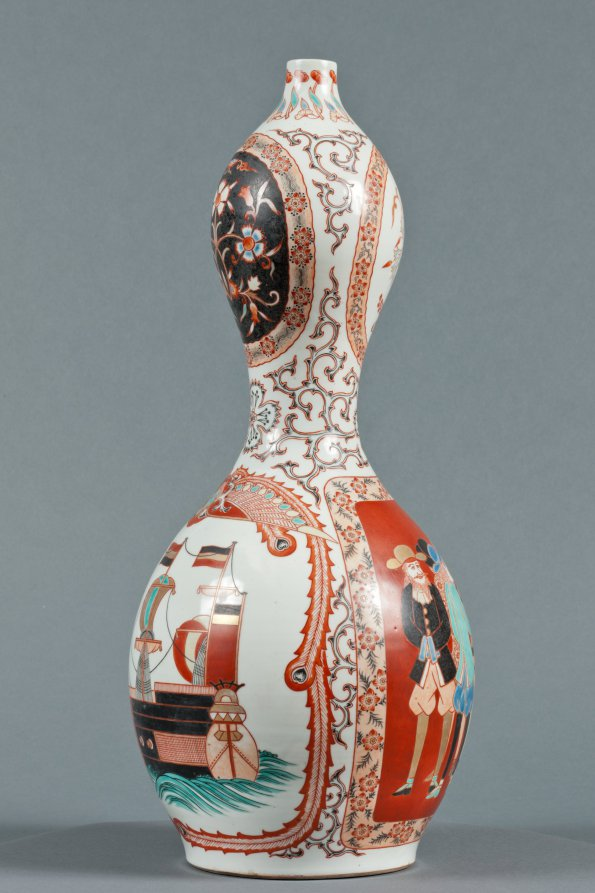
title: Bottle with Western Ships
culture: Japan, Edo period (1615–1868)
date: c. 1800–1868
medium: Porcelain with decoration in colored enamels and underglaze blue, overglaze enamels, and gold (Hizen ware, Arita type)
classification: Ceramic